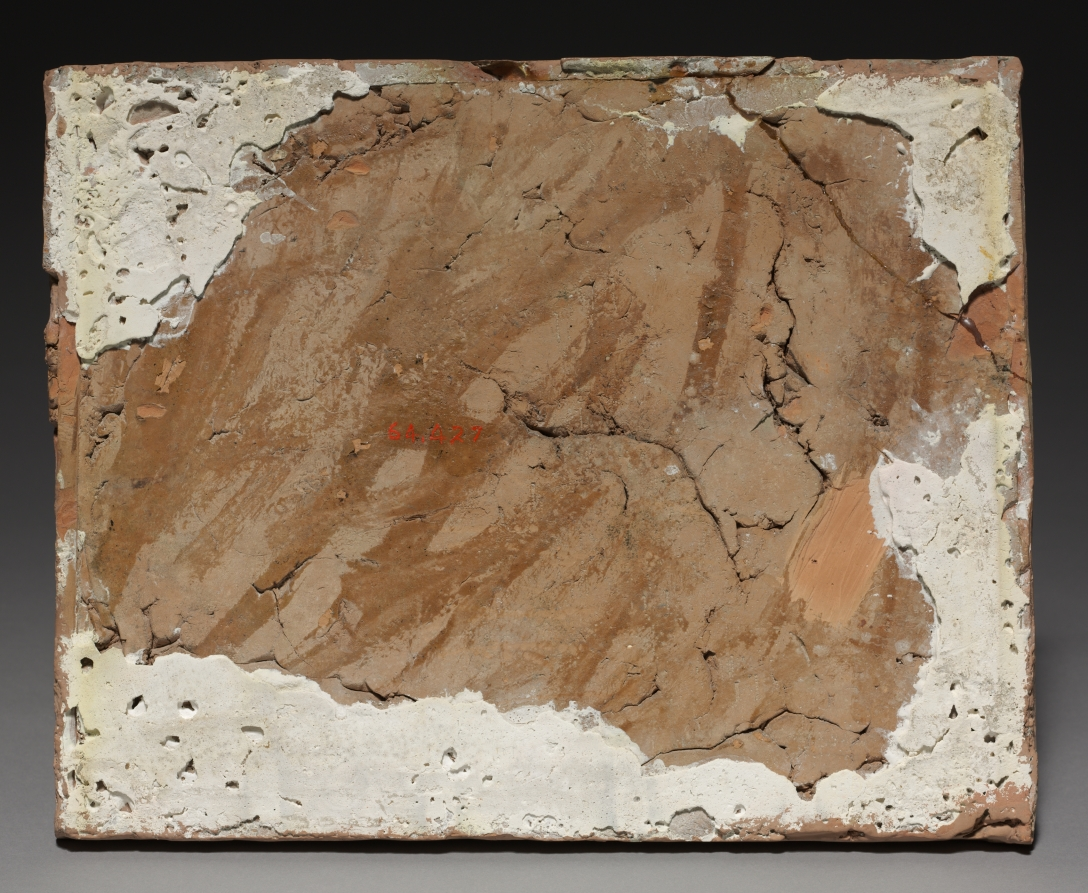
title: Rest on the Flight into Egypt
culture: Italy, Bologna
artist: Giuseppe Mazza (Italian, 1653–1741)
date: c. 1700–1710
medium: terracotta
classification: Sculpture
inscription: inscription in lower left corner: "G.M."